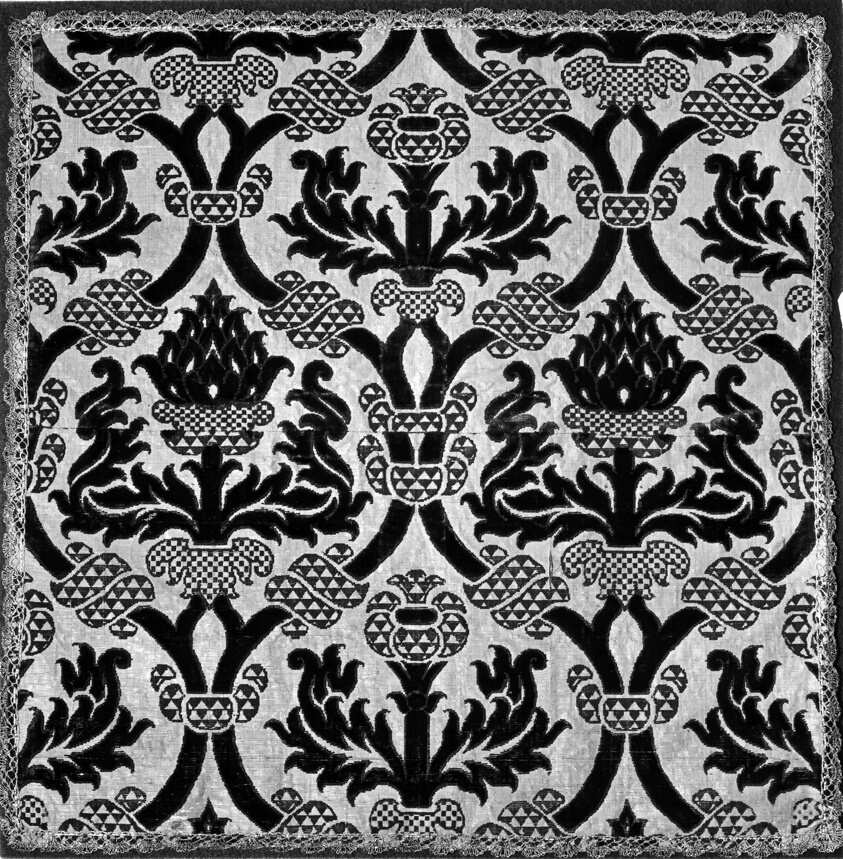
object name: Textile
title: Cover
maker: Italy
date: 16th century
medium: Silk, plain weave with gilt-metal strip supplementary facing wefts bound by secondary binding warps and supplementary pile warps forming cut and uncut voided velvet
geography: Italy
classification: textile; weaving - velvet